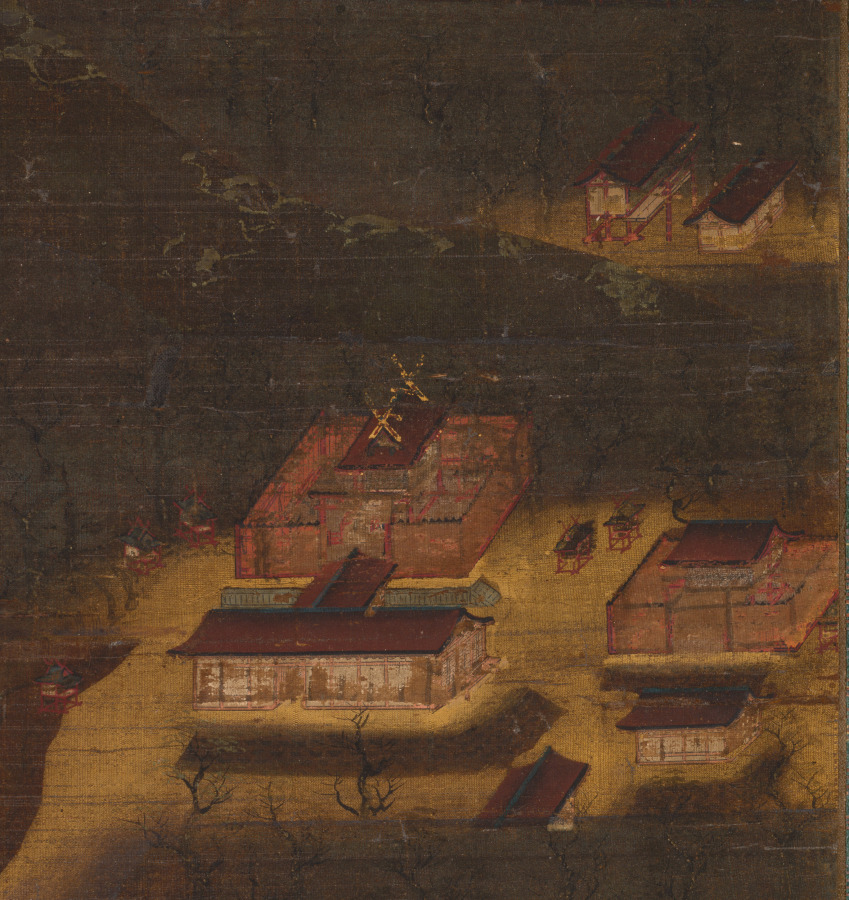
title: Kasuga Shrine Mandala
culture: Japan, Kamakura period (1185–1333)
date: early 1300s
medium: Hanging scroll; ink, color, and gold on silk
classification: Painting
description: A golden path beginning at the bottom of this painting leads up to four red-and-white buildings to the left, then to a fifth building on the right. These are the five shrine halls of Kasuga Taisha in Nara. Above and beyond the buildings is a sacred mountain range––with Mount Mikasa at center, Mount Wakakusa in gold to the left, and the sun or moon rising up behind the mountains. Sacred deer appear here and there. Five figures representing the original Buddhist forms of the five kami of the shrine complex stand on clouds above the mountains.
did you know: Sacred deer, the vehicles of the Kasuga deities, move about the shrine compound.